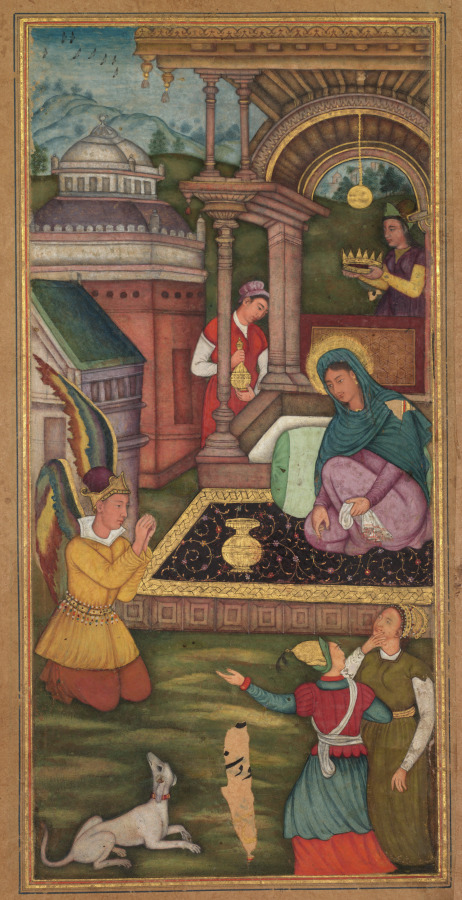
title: The Annunciation (folio 15 recto), from a Mirror of Holiness (Mir’at al-quds) of Father Jerome Xavier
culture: Mughal India, Allahabad, made for Prince Salim (1569–1627)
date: 1602–4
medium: Gum tempera, ink, and gold on paper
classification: Manuscript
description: Mary gazes down at the angel Gabriel as he kneels reverently, like a humble messenger, delivering the news that Mary will give birth to the son of God. His multicolored wings are forced within the boundary line of the painting field, visually implying a sense of subordination. Unlike many of the paintings in the Mirror of Holiness, the Annunciation is a familiar subject in European art, but the emphases vary. The Indian version depicts her as a queen, with a crown held above her head and attendants standing by.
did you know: The text states that Mary was only age 13 1/2 when the angel Gabriel came to her.